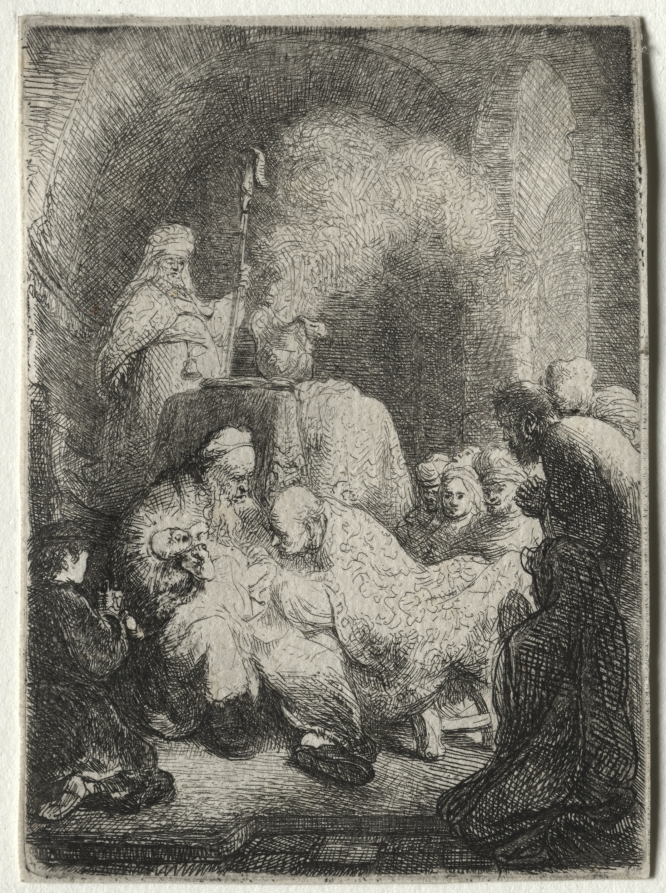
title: The Circumcision: Small Plate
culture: Netherlands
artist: Rembrandt van Rijn (Dutch, 1606–1669)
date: c. 1630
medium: etching with drypoint and engraving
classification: Print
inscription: VERSO, upper left, in graphite: 18492 [/rinbg?] ; center, in graphite: [illegible] ; lower left, in graphite: B. 48 ; lower right, in graphite: PS-1